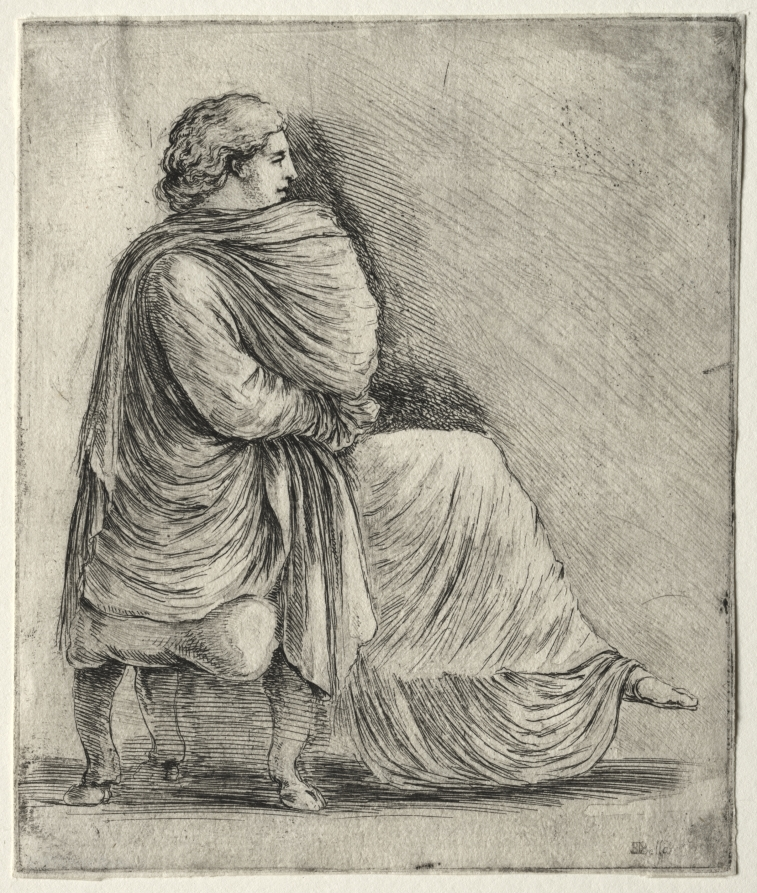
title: Woman Seated on a Stool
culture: Italy, 17th century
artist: Stefano Della Bella (Italian, 1610–1664)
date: c. 1660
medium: etching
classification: Print